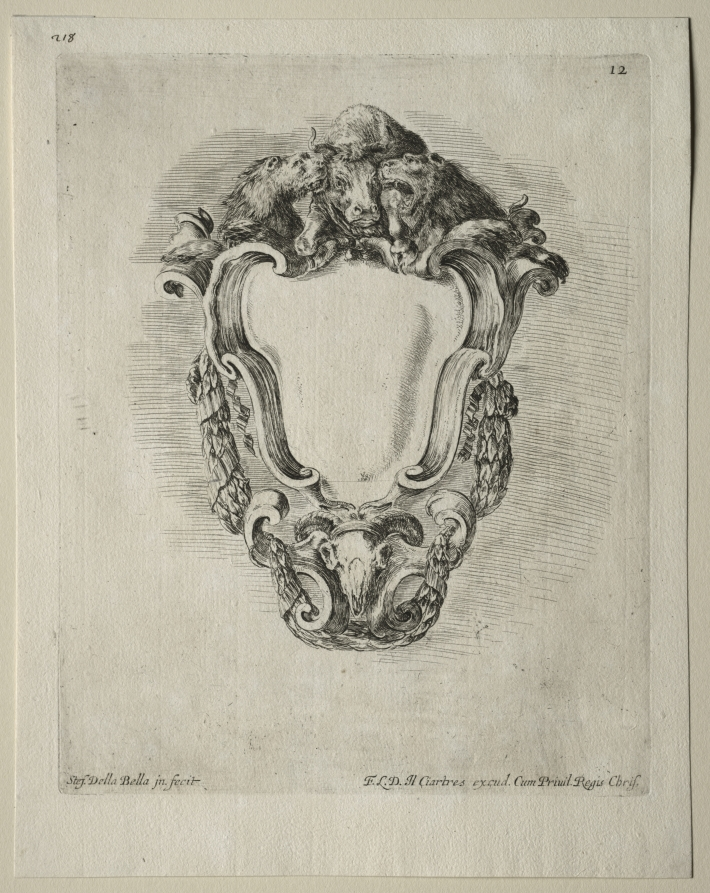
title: Collection of Various Caprices and New Designs of Cartouches and Ornaments: No 12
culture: Italy, 17th century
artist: Stefano Della Bella (Italian, 1610–1664)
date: 1646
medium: etching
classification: Print